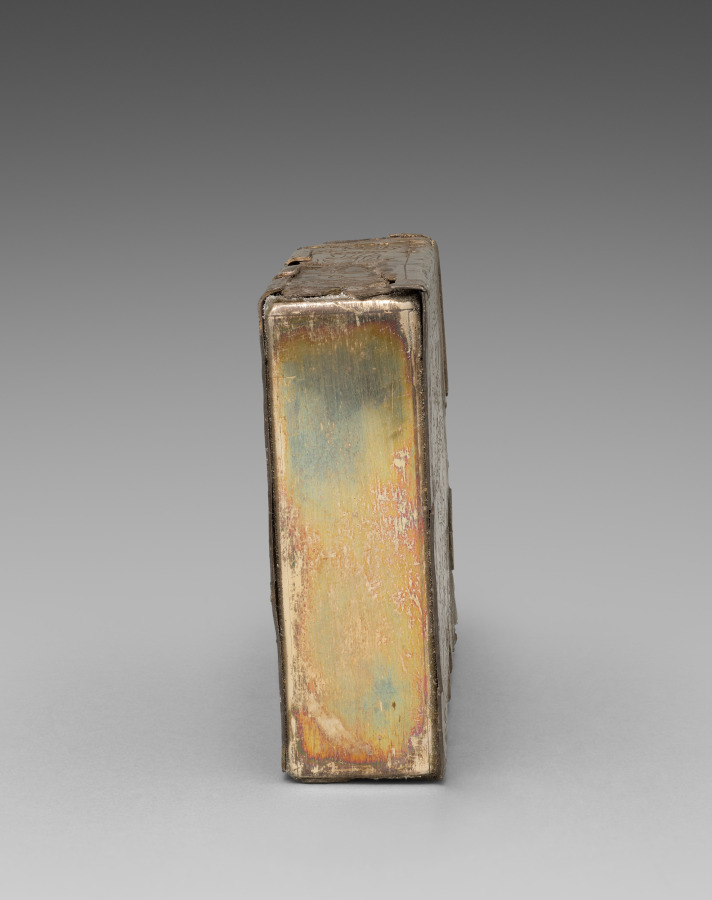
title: Buddhist Sutra Container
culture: Korea, Goryeo dynasty (918–1392)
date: 1100s-1200s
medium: gilt silver with incised Buddhist designs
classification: Metalwork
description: This container was designed to hold sutras, or Buddhist sacred texts. The Four Heavenly Kings, one for each of the cardinal directions, are incised on the exterior of the container. Images of the Four Heavenly Kings can often be found on Korean containers for sacred relics and sutras, and are symbolic of the wish to preserve the Buddha’s teachings.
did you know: This container was designed to hold a portable Buddhist sacred text.